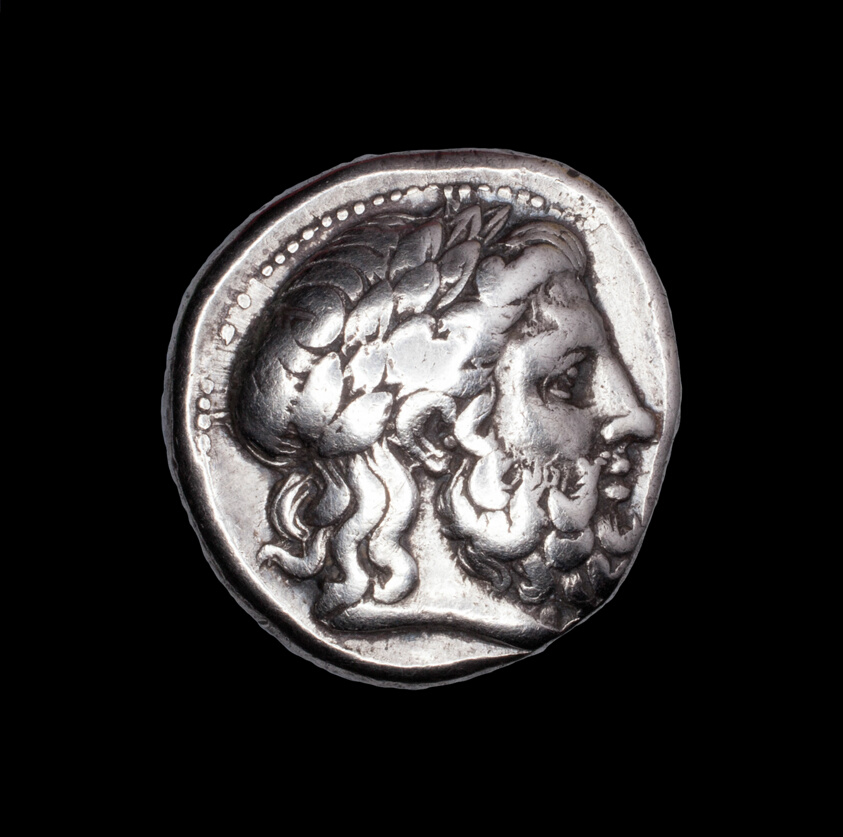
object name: Coin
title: Tetradrachm (Coin) Depicting the God Zeus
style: hellenistic, greek, ancient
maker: Greek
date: 359-336 BCE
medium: Silver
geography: Kavála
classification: coin; ancient art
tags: zeus, mythological figures